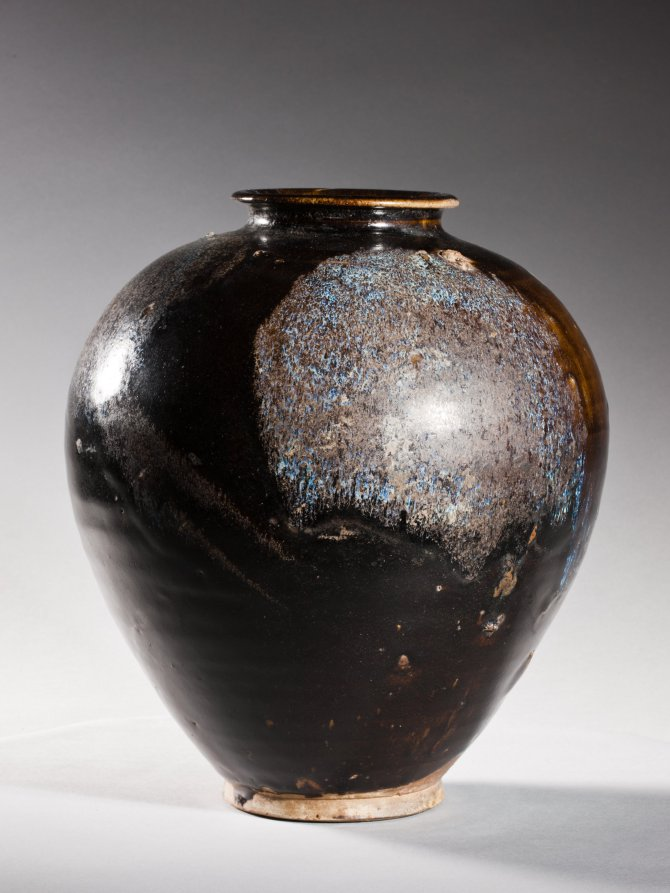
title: Jar: Black Ware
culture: China, Henan province, Huangdao kilns, Tang dynasty (618-907)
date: 700s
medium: glazed stoneware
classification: Ceramic